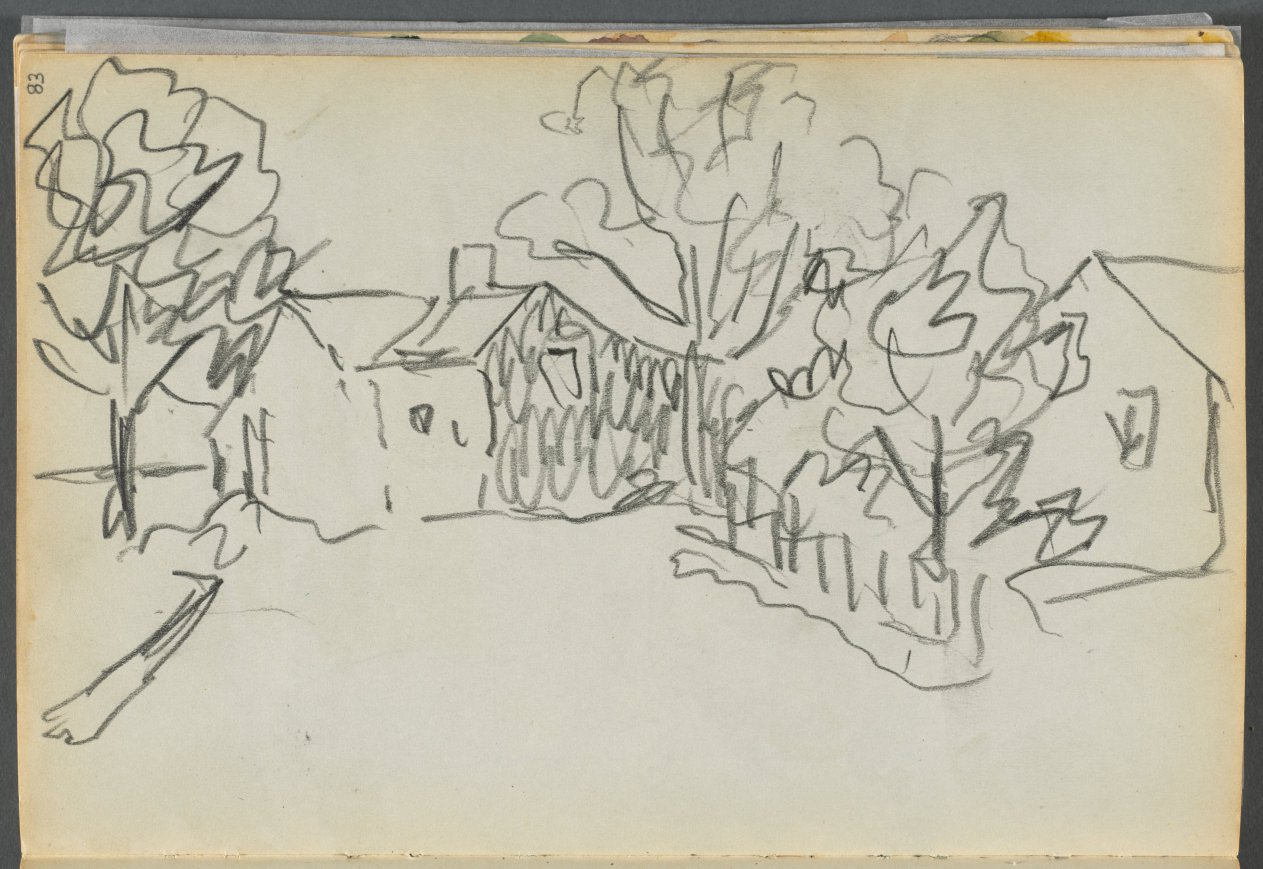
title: Sketchbook- The Granite Shore Hotel, Rockport, page 083: Village Scene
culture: America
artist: Maurice Prendergast (American, born Newfoundland [now Canada], 1858–1924)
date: 1905–10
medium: graphite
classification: Bound Volume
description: This sketchbook contains 72 pages of pencil drawings and 9 watercolors of Cape Ann. On the inside of the cover Prendergast wrote the address of the Granite Shore Hotel in Rockport, Massachusetts.